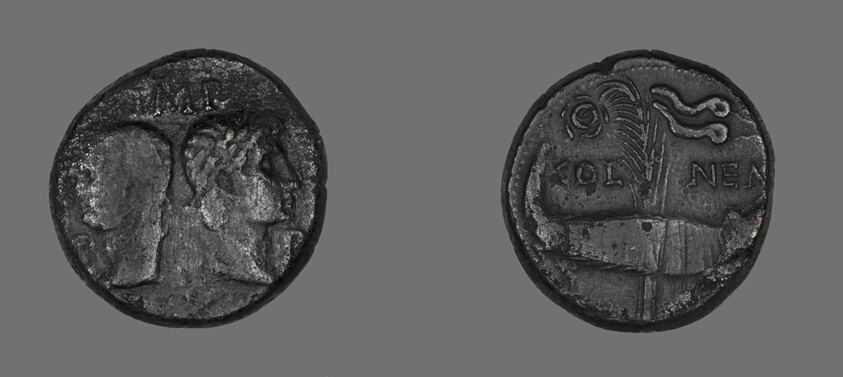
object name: Coin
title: As (Coin) Portraying Augustus and Agrippa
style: roman (ancient, style or period), ancient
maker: Roman; minted in Nimes, Gaul (now France)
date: 20 BCE-14 CE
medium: Bronze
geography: Roman Empire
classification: coin; ancient art